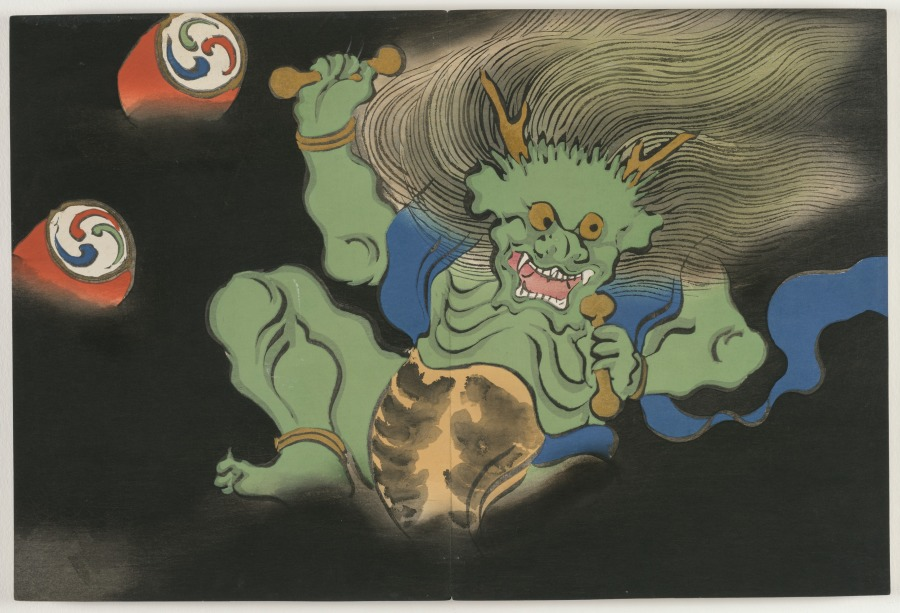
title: Flowers of a Hundred Worlds (Momoyogusa): God of Thunder (Raijin) (Kaminari)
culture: Japan, Meiji period (1868–1912)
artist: Kamisaka Sekka (Japanese, 1866–1942)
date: 1909–10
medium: color woodcuts with gold and silver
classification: Bound Volume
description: This print from a set of three woodblock printed albums displays the graphic design prowess of Kamisaka Sekka. The images were first distributed one by one to subscribers to the series but later were reissued in bound form, like this book, for mass consumers. Each print features a vignette taken from nature or Japanese literature. Many of the scenes have a long history in Japan, originating in the 900s or 1000s and having been interpreted by all manner of artists since that time. Sekka’s selections hew closely to precedents from the Rinpa style originated by painter Tawaraya Sōtatsu (c. 1570–c. 1640) and calligrapher Hon’ami Kōetsu (1558–1637).